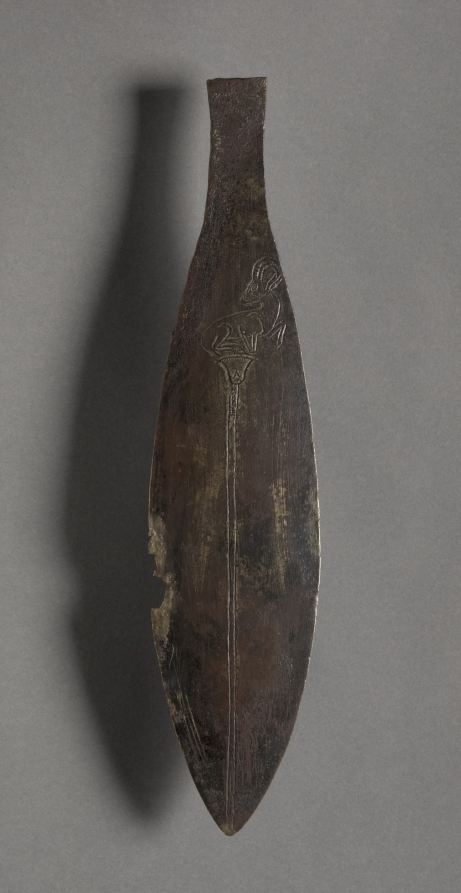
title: Dagger Point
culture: Egypt, New Kingdom (1540–1069 BCE), Dynasty 18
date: 1540–1296 BCE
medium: bronze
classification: Implements